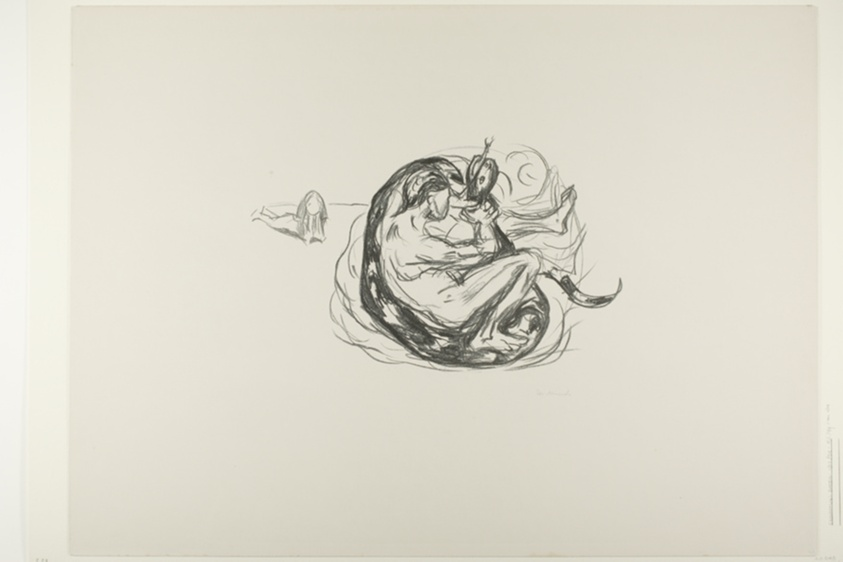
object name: Print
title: The Serpent is Killed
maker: Edvard Munch (Norwegian, 1863-1944)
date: 1908/09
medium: Lithograph on paper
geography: Norway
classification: lithograph; print; prints and drawing